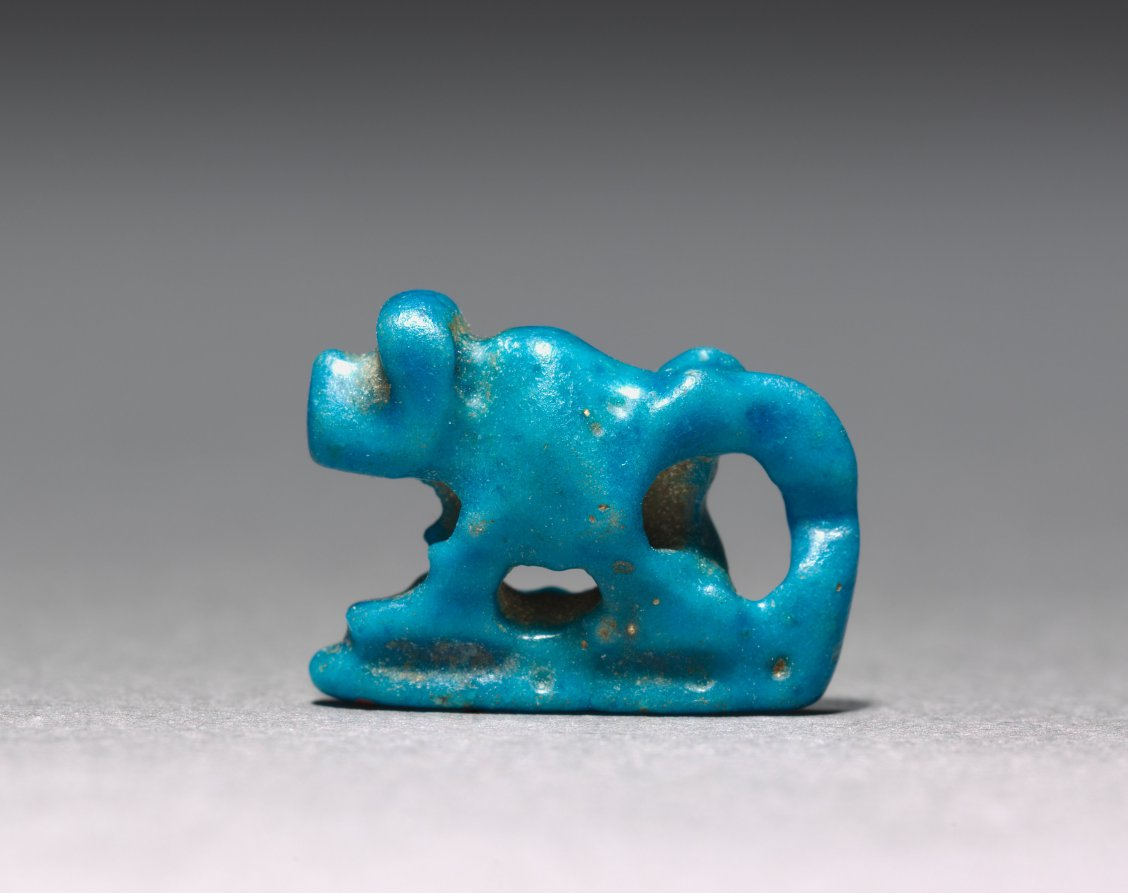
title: Amulet of a Walking Baboon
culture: Egypt, First Intermediate period (2123–2040 BCE)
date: 2123–2040 BCE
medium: turquoise faience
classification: Amulets